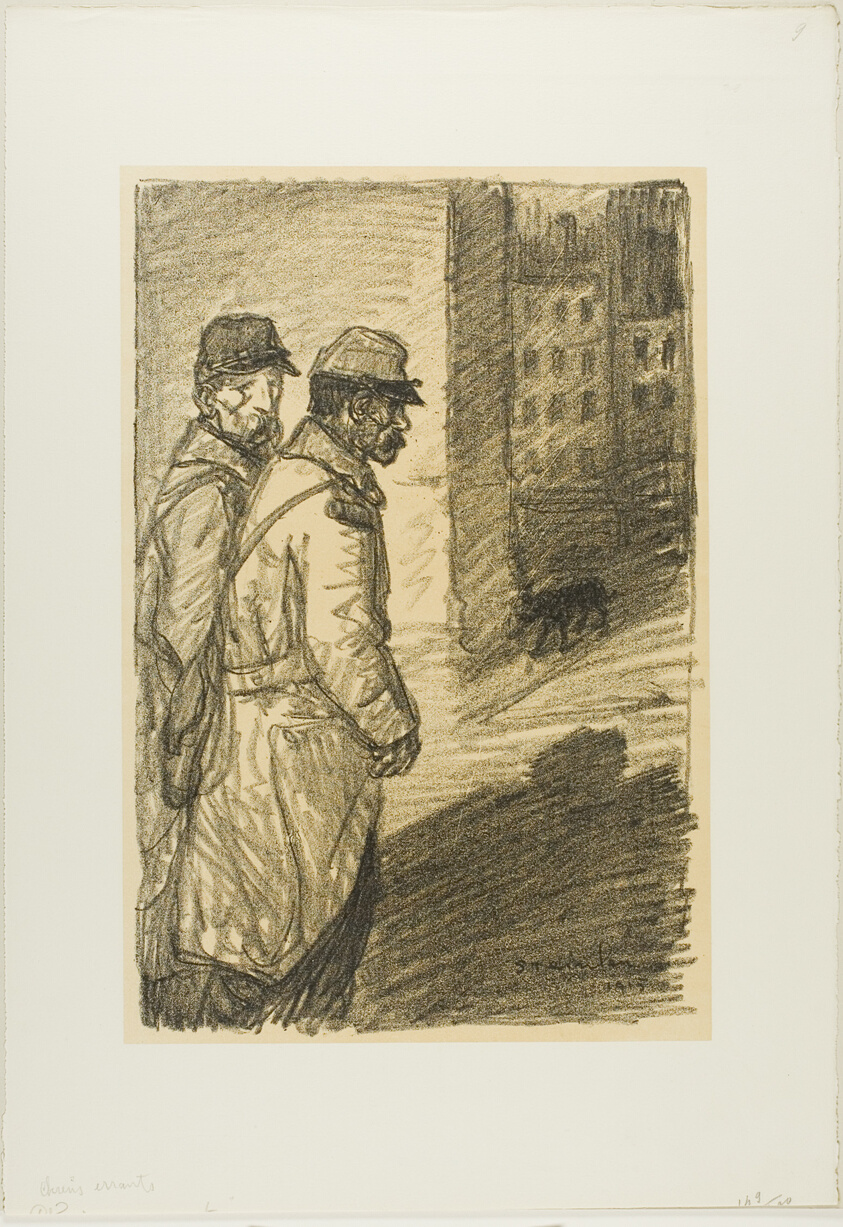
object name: Print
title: Errant dogs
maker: Théophile-Alexandre Steinlen; French, born Switzerland, 1859-1923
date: 1915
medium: Lithograph in black over fawn tint on off-white wove paper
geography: France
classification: lithograph; print; prints and drawing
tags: dogs, animals